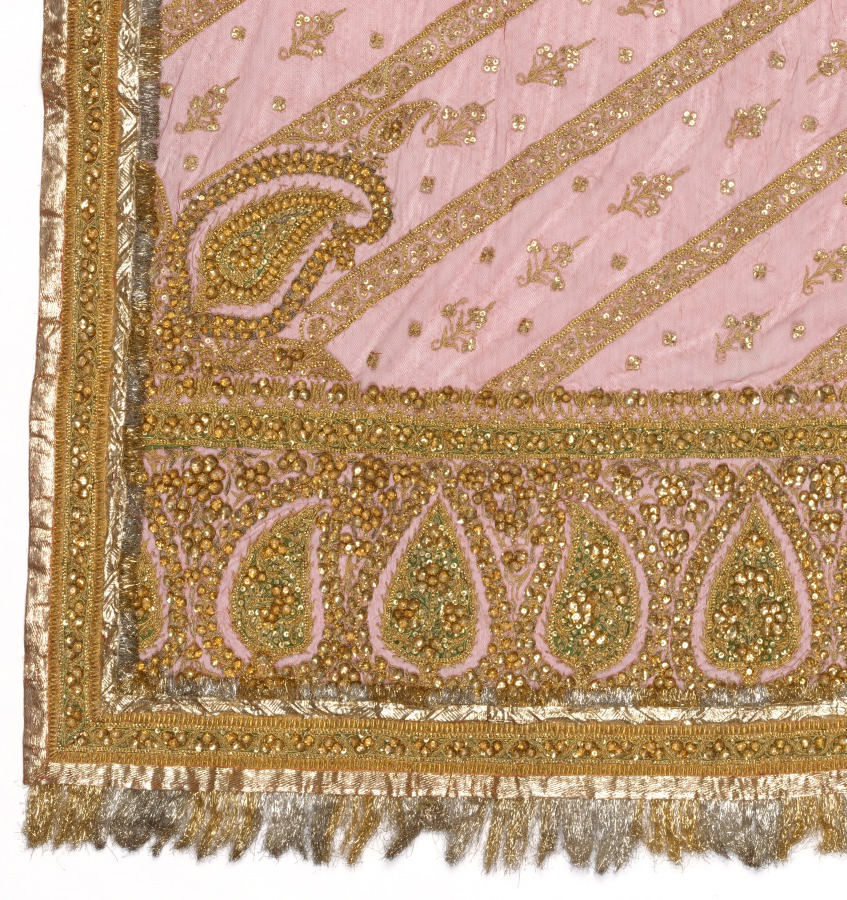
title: Metal Embroidery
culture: India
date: early 1900s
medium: Silk net with metal thread, embroidery and sequins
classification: Embroidery